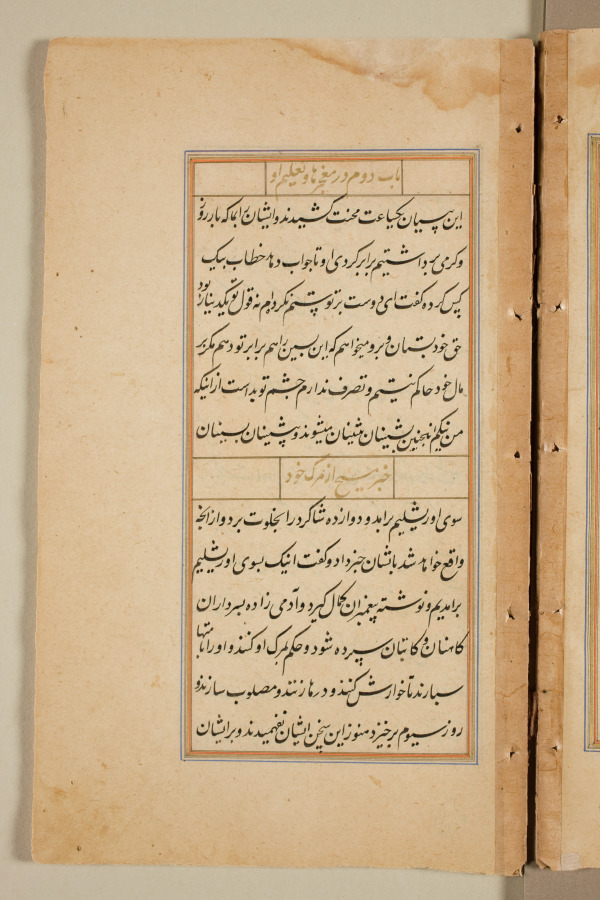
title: Text page from a Mirror of Holiness (Mir’at al-quds) of Father Jerome Xavier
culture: Mughal India, Allahabad, made for Prince Salim (1569–1627)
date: 1602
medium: Ink and gold on paper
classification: Manuscript